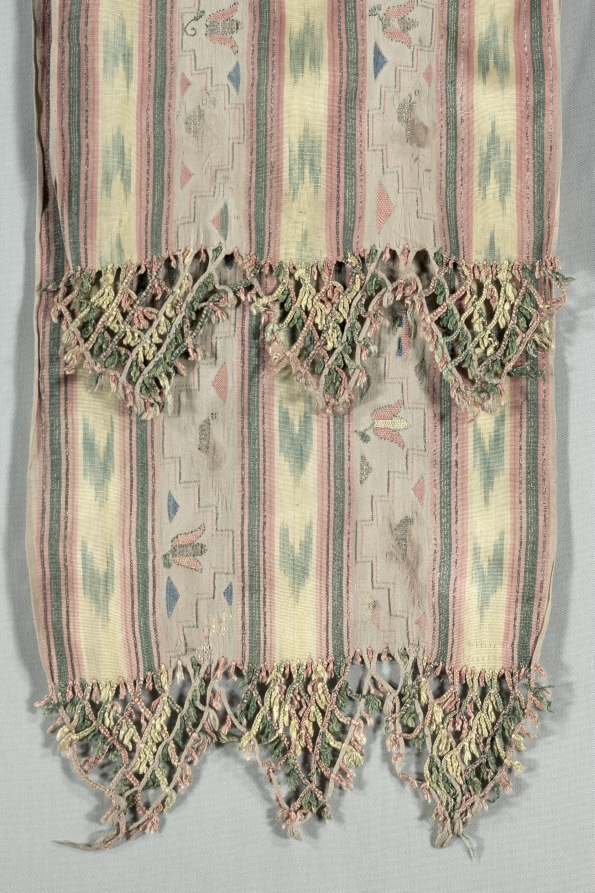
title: Scarf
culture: Mexico, late 18th-19th century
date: late 1700s-1800s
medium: weaving, embroidery and ikat techniques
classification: Textile